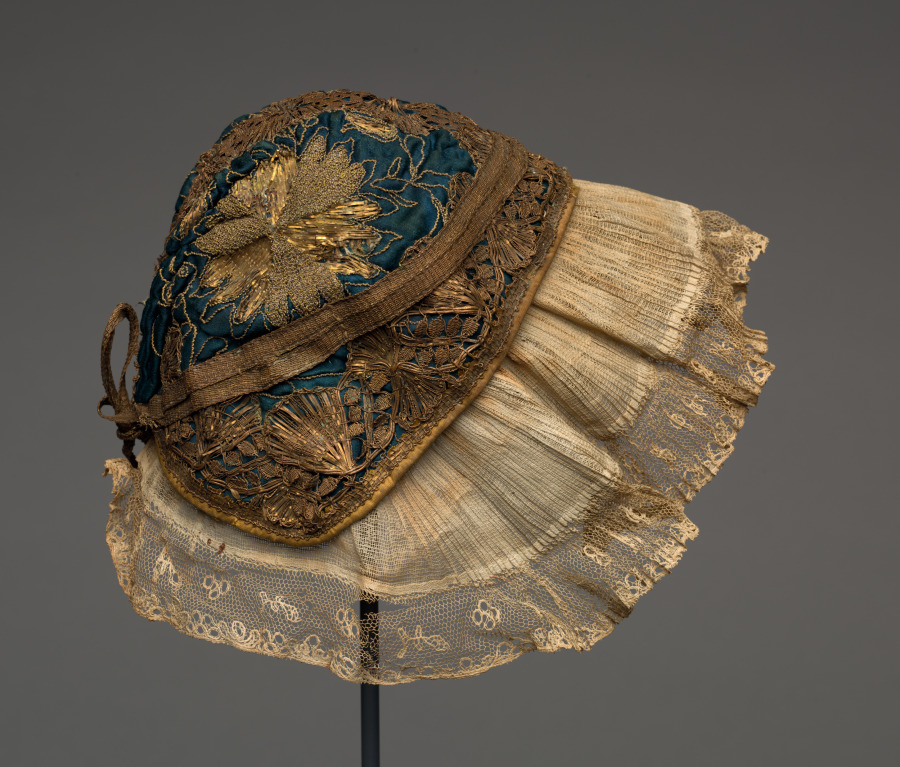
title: Embroidered Cap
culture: Germany, Mecklenburg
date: 1700s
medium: embroidery; satin ground embroidered with gold thread and decorated with gold lace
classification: Garment